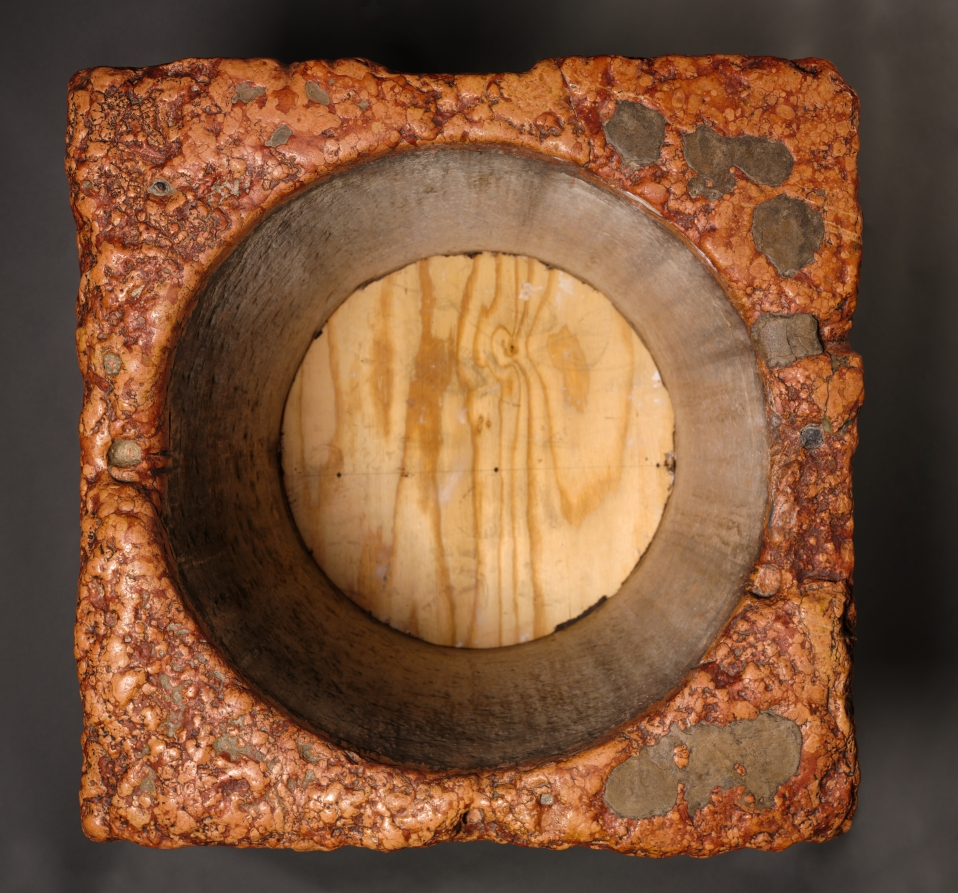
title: Well Head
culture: Italy, probably Verona, 15th century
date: 1400s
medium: pink limestone (called "Verona Marble")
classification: Sculpture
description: A well head is an architectural element that protects the mouth of a well. This example is both decorative and functional. The durable pink limestone well head facilitated access to the water whose restorative nature is echoed in the flowers and vases that ornament its surface.